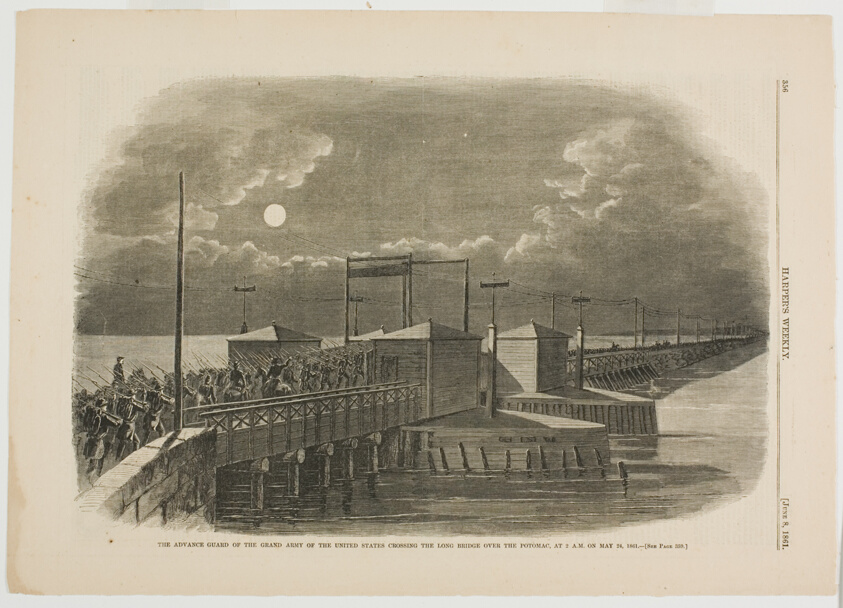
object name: Print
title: The Advance Guard of the Grand Army of the United States Crossing the Long Bridge over the Potomac at 2 A.M. on May 24, 1861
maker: Winslow Homer (American, 1836-1910); published by Harper's Weekly (American, 1857-1916)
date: published June 8, 1861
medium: Wood engraving on paper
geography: United States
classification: wood engraving; print; prints and drawing